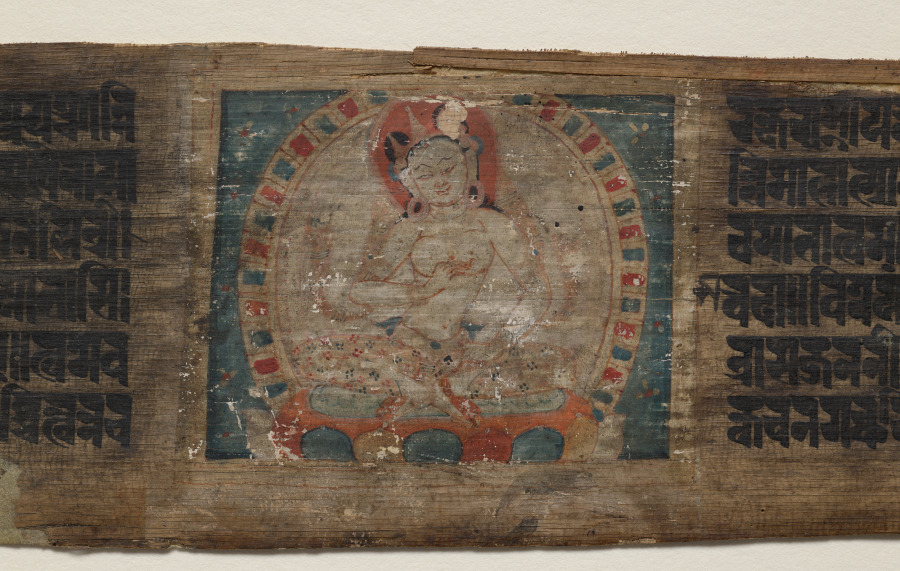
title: Prajnaparamita ﬂanked by two female ﬁgures, folio 1 (verso), from a Manuscript of the Perfection of Wisdom in Eight Thousand Lines (Ashtasahasrika Prajnaparamita-sutra)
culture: Eastern India, Bihar, Vikramashila Monastery. Painting: Nepal, Kathmandu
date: Sunday, September 14, 1119 (year 239 of the Newar Samvat in the month of Ashvina)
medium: Gum tempera and ink on palm leaf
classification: Painting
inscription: Om namo bhagavatya ārya Prajñāpāramitāyai // nirvikalpe namas tubhyaṃ prajñāpāramite 'mite yā tvaṃ sarvānavadyāṅgi niravadyair nirīkṣyase // ākāśam iva nirlepāṃ niṣprapañcāṃ nirakṣarām yas tvāṃ paśyati bhāvena sa paśyati tathāgatam // tava cārye guṇāḍhyāyā buddhasya ca jagadguroḥ na paśyanty antaraṃ santaś candracandrikayor iva // kṛpātmakāḥ prapadya tvāṃ buddhadharmapuraḥsarīm sukhenāyānti māhātmyam atulaṃ bhaktivatsale // sakṛd apy āśaye śuddhe yas tvāṃ vidhivad īkṣate tenāpi niyataṃ siddhiḥ prāpyate 'moghadarśane // sarveṣām api vīrāṇāṃ parārthaniratātmanām poṣikā janayitrī ca mātā tvam asi vatsalā // yad buddhā lokaguravaḥ putrās tava kṛpālavaḥ tena tvam api kalyāṇi sarvasattvapitāmahī // sarvapāramitābhis tvaṃ nirmalābhir anindite candralekheva tārābhir anuyātāsi sarvadā // vineyaṃ janam āsādya tatra tatra tathāgataiḥ bahurūpā tvam evaikā nānānāmabhir īḍyase // prabhāṃ prāpyeva dīptāṃśor avaśyāyodabindavaḥ tvāṃ prāpya pralayaṃ yānti doṣā vādāś ca vādinām // tvam eva trāsajananī bālānāṃ bhīmadarśanā āśvāsajananī cāsi viduṣāṃ saumyadarśanā // yasya tvayy apy abhiṣvaṅgas tvannāthasya na vidyate tasyāmba katham anyatra rāgadveṣau bhaviṣyataḥ // nāgacchasi kutaś cit tvaṃ na ca kva cana gacchasi sthāneṣv api ca [sarveṣu vidvadbhir nopalabhyase //]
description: In the center of the first folio, the personification of the texts found within the manuscript is shown as a crowned four-armed goddess holding a rosary, palm leaf, and giving a mudra, or symbolic hand gesture, indicating that she is in the process of teaching. The haloed Prajnaparamita’s golden skin tone and accoutrements showcase the image’s self-reflexive relationship to the light-colored palm leaf that was used to make this book. The text on this leaf is not the Perfection of Wisdom itself, but rather a preamble of praises to the goddess known as the Prajnaparamita-stotra of Rahula. These hymns would have continued onto folio 2 of the manuscript, which was unfortunately lost before the volume was acquired by the Cleveland Museum of Art.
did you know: Although barely visible now, delicate diaphanous scarves are draped around the arms of all three figures.